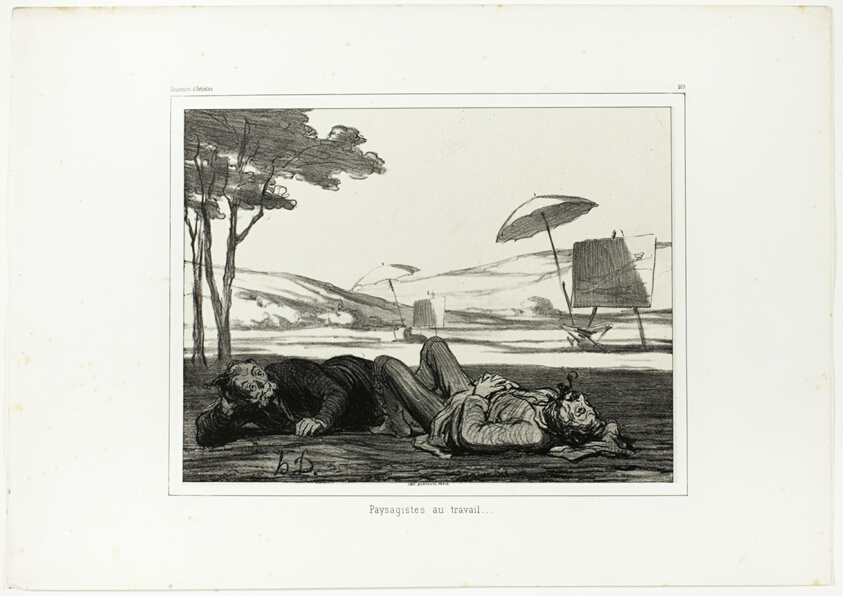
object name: Print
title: Landscape Painters at Work, plate 309 from Souvenirs d'artistes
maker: Honoré Victorin Daumier; French, 1808-1879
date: 1862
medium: Lithograph on ivory Japanese paper, laid down on ivory wove paper (chine collé)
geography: France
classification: lithograph; print; prints and drawing